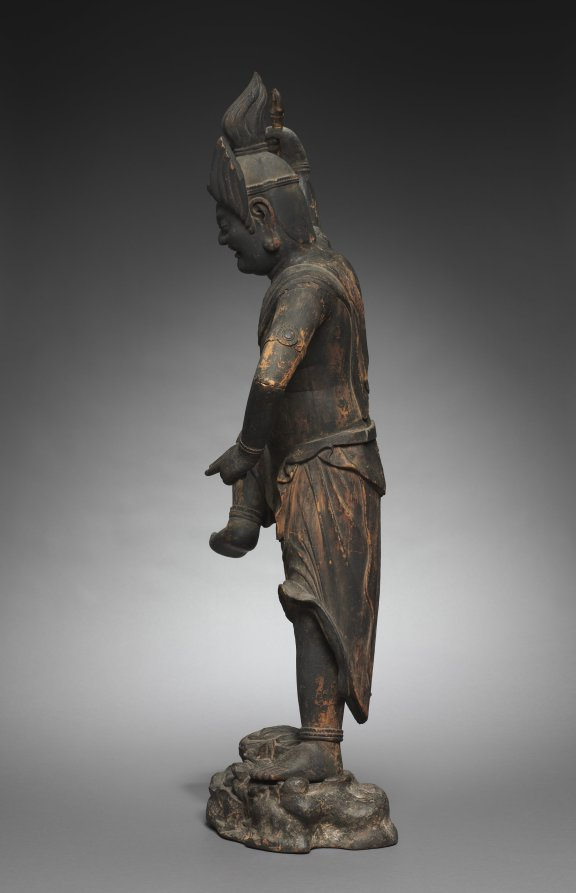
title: Zaō Gongen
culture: Japan, Kamakura period (1185–1333)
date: 1200s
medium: wood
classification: Sculpture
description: Zaō Gongen is the guardian deity of Mount Kinpu in Yoshino south of Nara. Zaō appeared at the behest of En no Gyōja, who prayed for a powerful protector of the mountain. The deity was described as a combined manifestation of the Buddha Shakyamuni, Thousand-Armed Kannon, and Miroku. These three deities were viewed as the past, present, and future protectors of the world. Zaō’s appearance derives from portrayals of fierce Buddhist deities.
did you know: Zaō Gongen wears the pelt of a large feline, the face of which is near his knee.